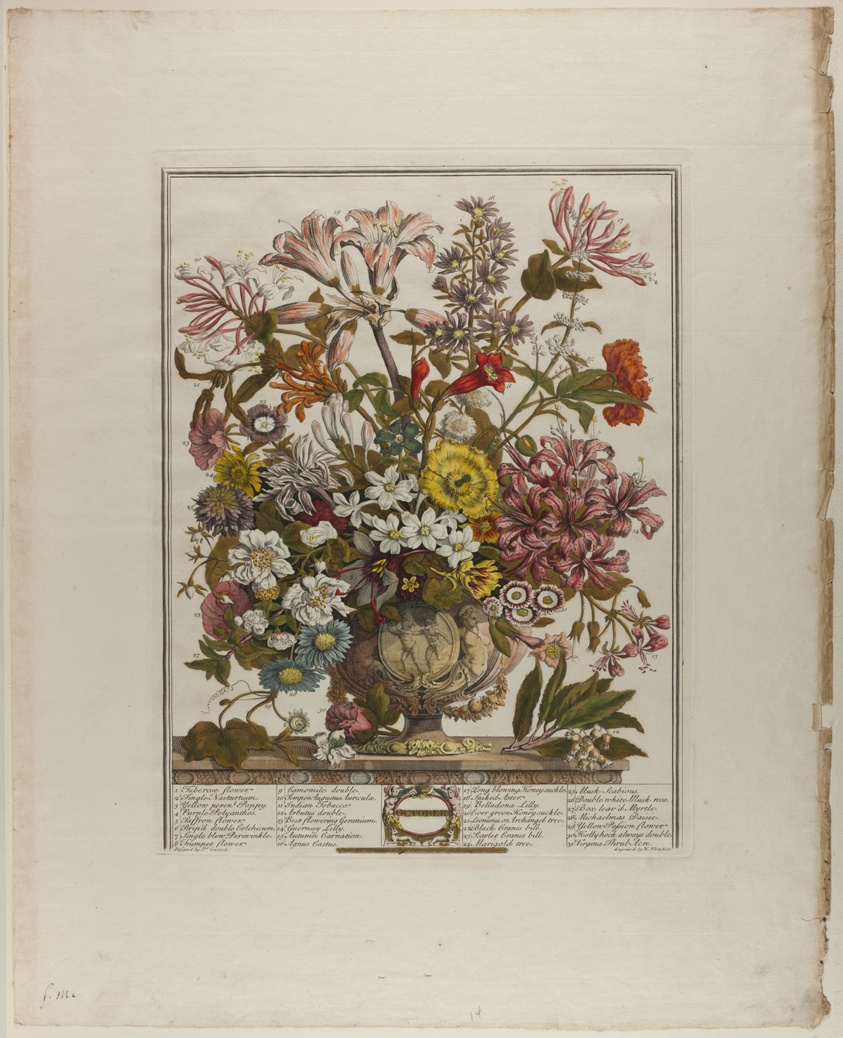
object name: Print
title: October, from Twelve Months of Flowers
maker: Henry Fletcher (English, 1710-1750); after Peter Casteels III (Flemish, 1684-1749)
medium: Engraving in black ink with opaque and translucent watercolor on cream laid paper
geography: England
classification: etching; print; prints and drawing